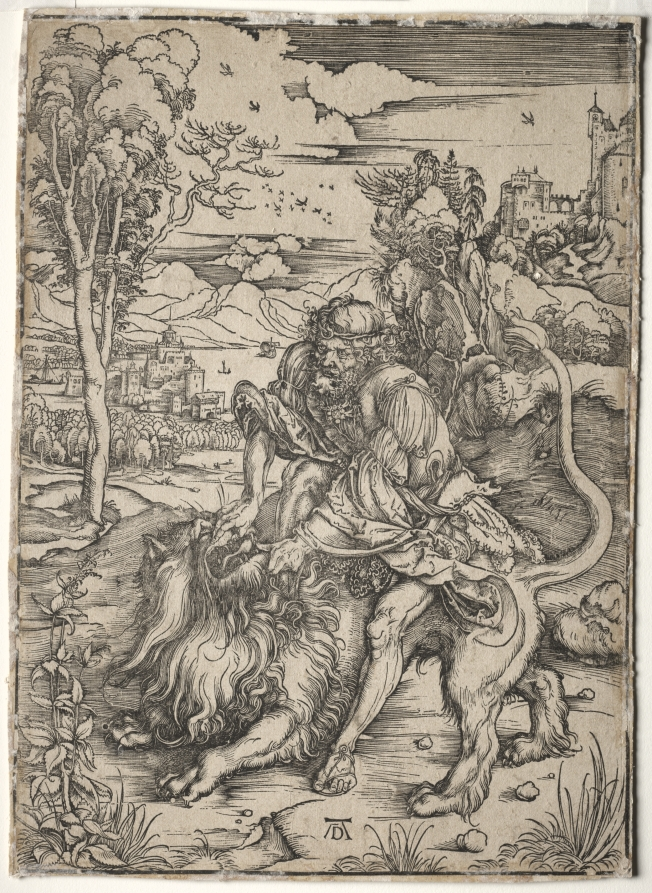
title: Samson Killing the Lion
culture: Germany, late 15th-early 16th Century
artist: Albrecht Dürer (German, 1471–1528)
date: c. 1496–97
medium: woodcut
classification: Print